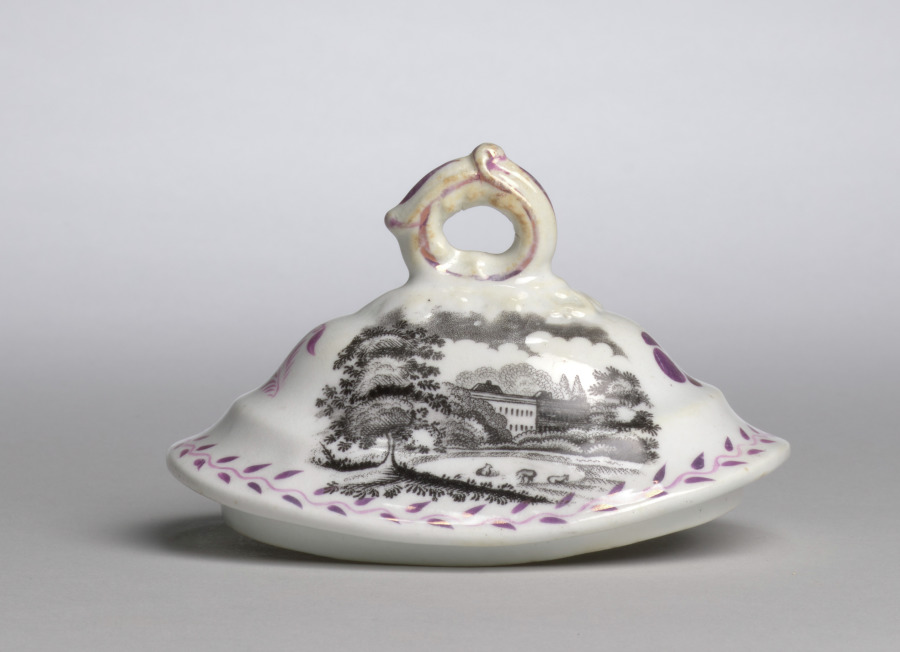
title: Sugar Bowl and Lid (lid)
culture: England, 19th century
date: c. 1800–1825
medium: earthenware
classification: Ceramic